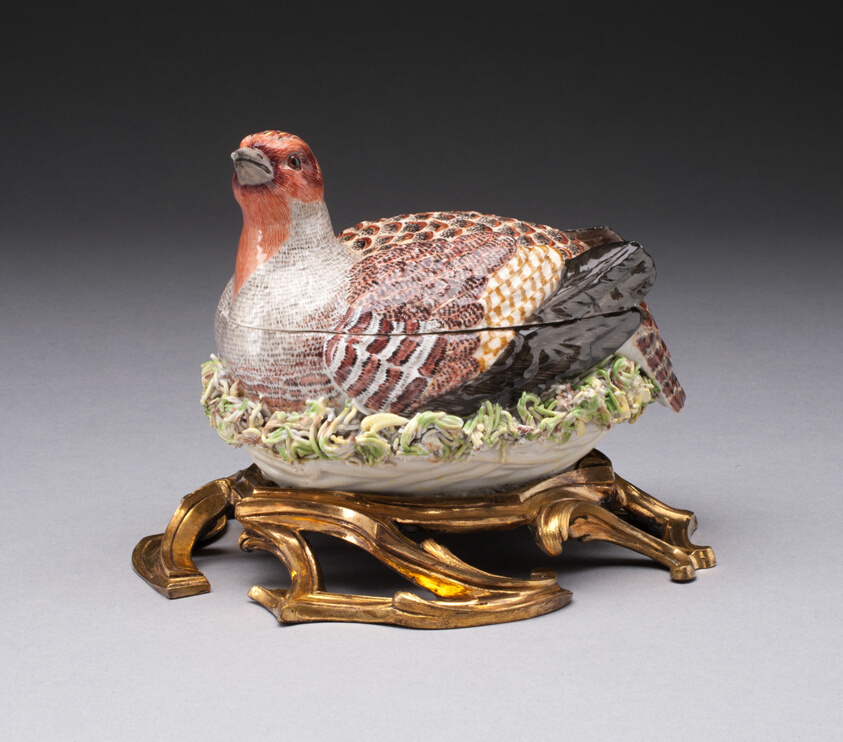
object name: Ceramics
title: Partridge Tureen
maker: Meissen Porcelain Manufactory (German, founded 1710)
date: c. 1748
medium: Hard-paste porcelain, polychrome enamels, and gilding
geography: Meissen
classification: tableware; porcelain; european decorative arts; ceramics